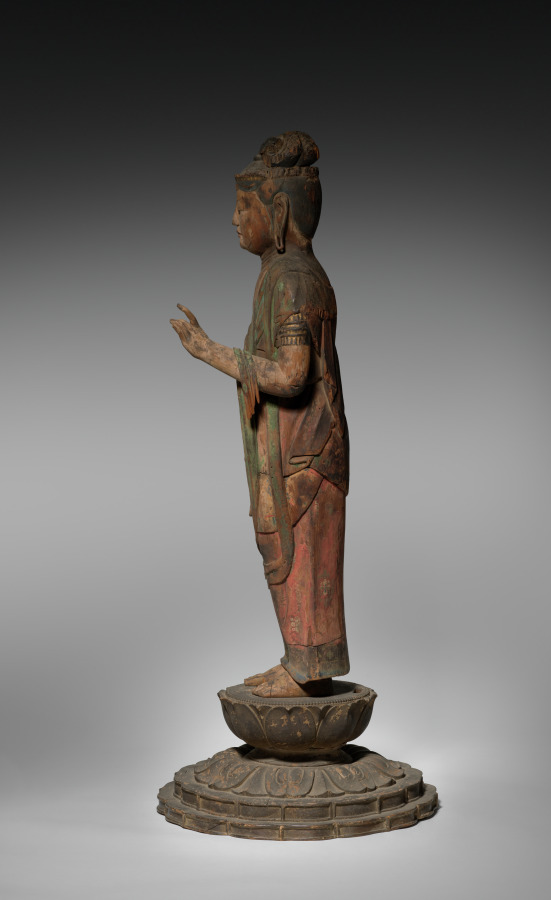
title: Shō Kannon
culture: Japan, Heian period (794–1185)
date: 900s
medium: Wood with traces of color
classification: Sculpture